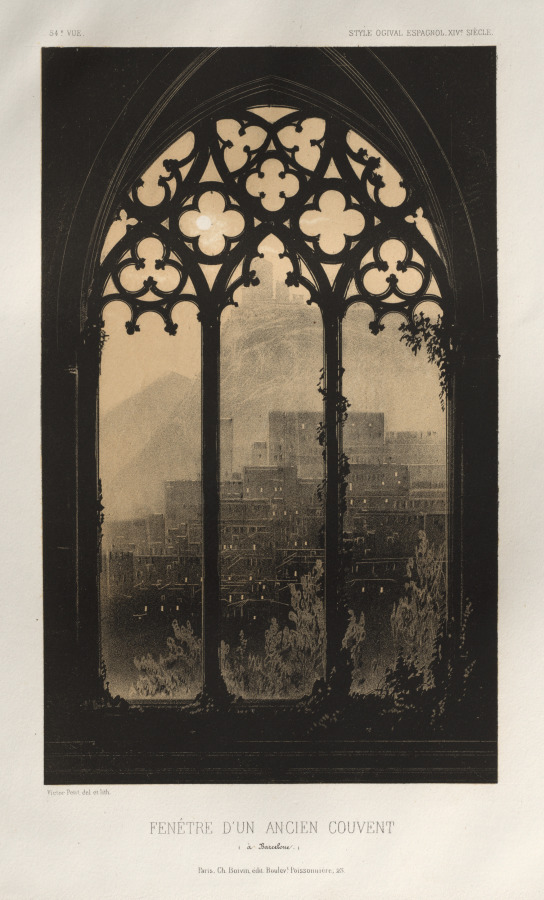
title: Architecture Pittoresque ou Monuments des XVeme. Et XVIeme. Siecles: Chateaux de France des XV et XVI Siecles: Pl. 54, Fenêtre D'un Ancien Couvent (à Barcelone)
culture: France, 19th century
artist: Victor Petit (French, 1817–1874)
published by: Charles Boivin (publisher and editor); Lith de Godard a Paris (printer)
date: 1860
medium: lithograph with tint stone, from portfolio of 100 lithographs with tint stone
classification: Print